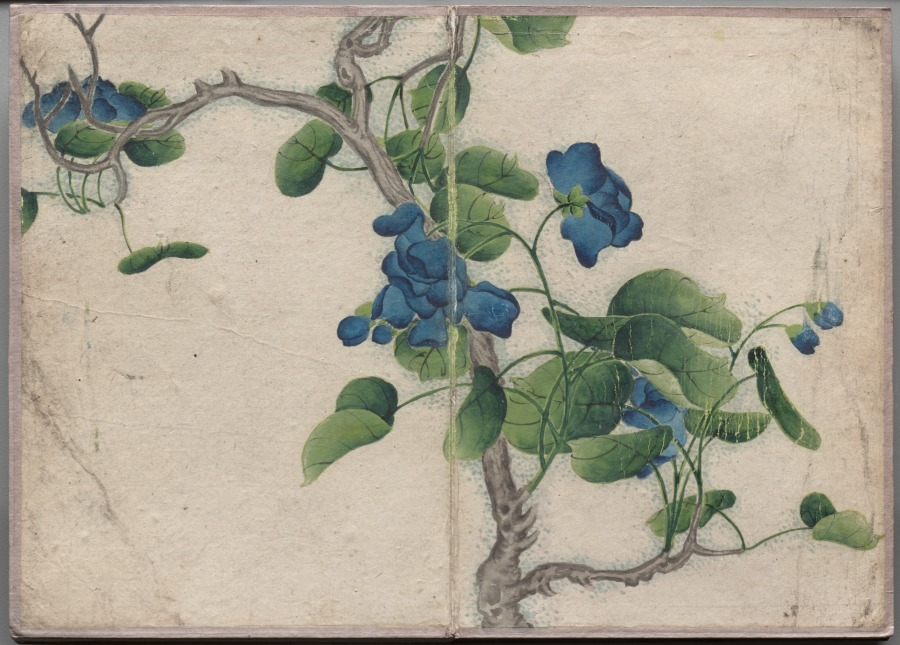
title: Desk Album: Flower and Bird Paintings (Climbing Blue Flowers)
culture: China, Qing dynasty (1644-1911)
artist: Zhang Ruoai (Chinese, 1713–1746)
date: 1700s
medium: album leaf, ink and color on paper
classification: Painting